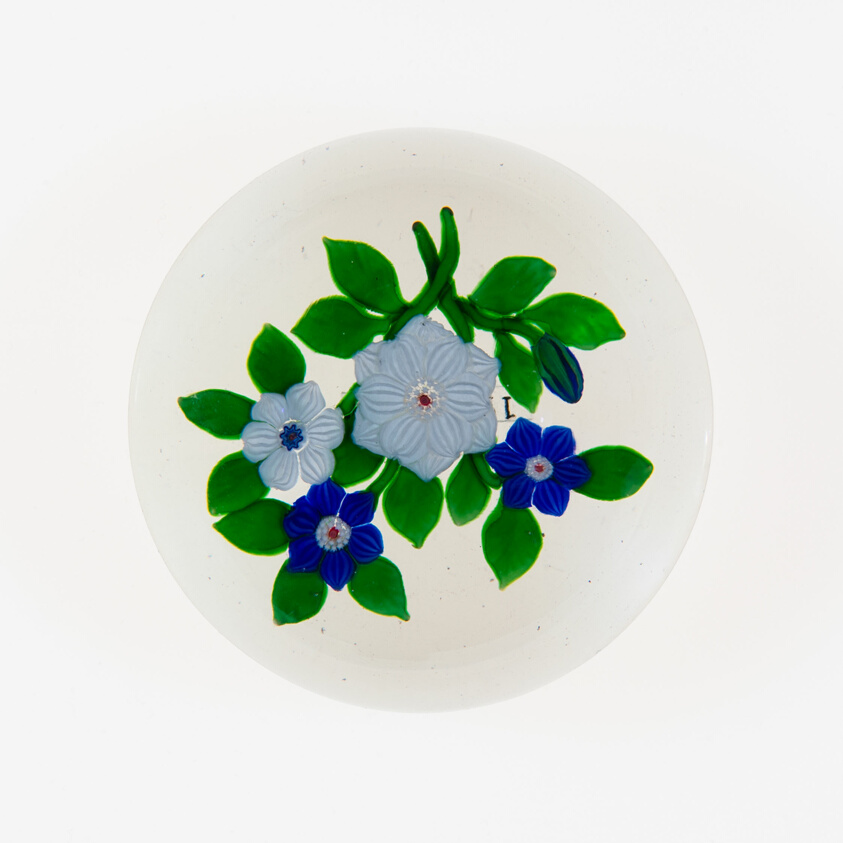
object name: Glass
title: Paperweight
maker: Baccarat Glassworks (Cristalleries de Baccarat); Lorraine, France, founded 1764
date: c. 1848–55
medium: Glass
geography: Lunéville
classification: paperweight; lampwork; european decorative arts; glass